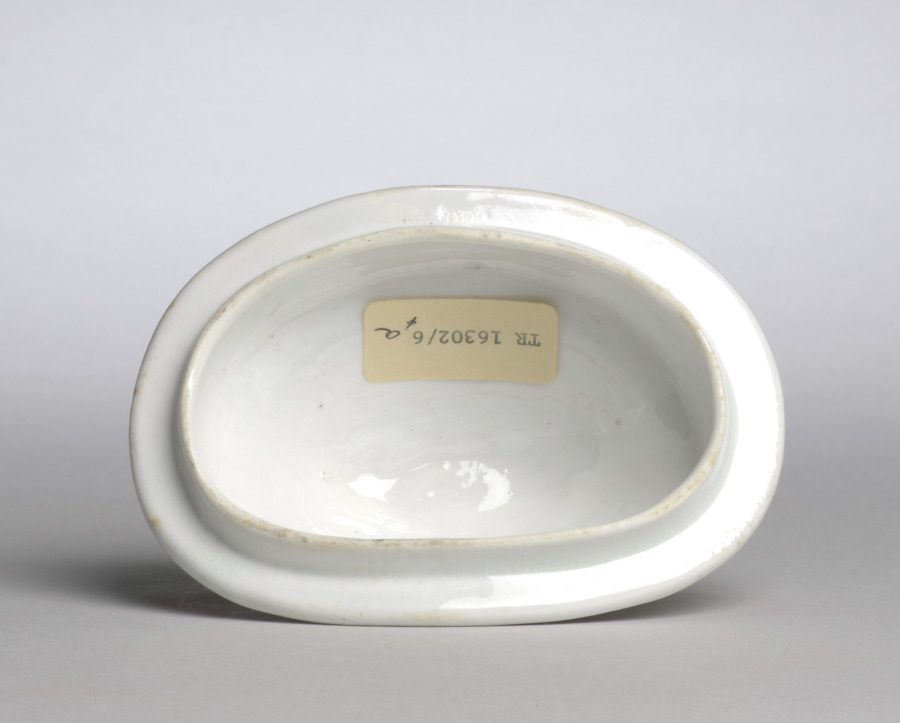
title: Sugar Bowl and Lid (lid)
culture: England, 19th century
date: c. 1800–1825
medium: earthenware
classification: Ceramic